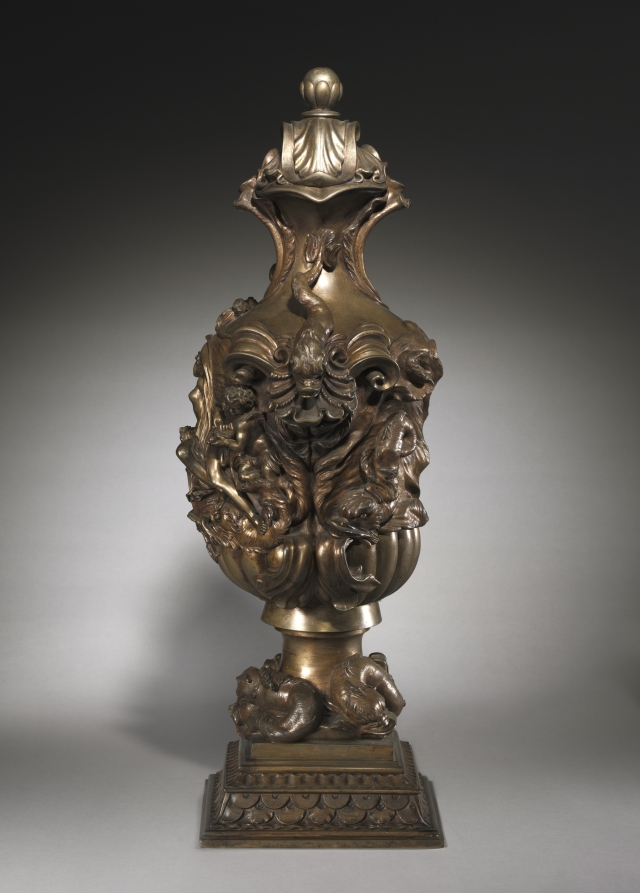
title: Ewer with Triumph of Galatea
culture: Italy, Florence, late 17th-early 18th Century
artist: Massimiliano Soldani (Italian, 1656–1740)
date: c. 1700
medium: bronze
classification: Sculpture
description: Upon discovering the sea nymph Galatea's infidelity, her betrothed, the Cyclops Polyphemus, pulverizes her lover Acis with a rock. In grief, Galatea turns his blood into a river and Acis becomes god of that river, which bears his name. Here Galatea escorts a swarm of sea creatures in celebration of Acis's apotheosis.